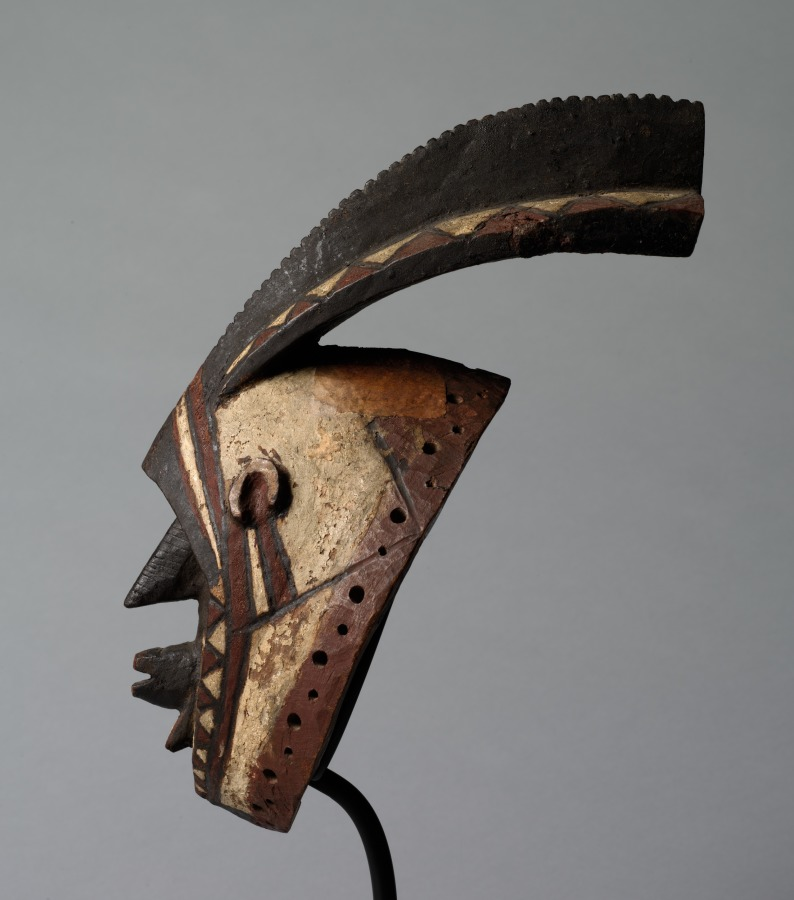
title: Mask (wan-balinga)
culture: Africa, West Africa, Burkina Faso, Mossi-style blacksmith-carver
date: early 1900s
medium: Wood and paint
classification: Mask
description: Only the farmers among the Mossi people employ masks. This mask’s proper name, wan-balinga, evokes a mythical figure who was the mother of the first Mossi ruler. Such masks are most typically worn and danced with on the occasion of the funeral of a male or female elder as escorts of the corpse to the grave. They also appear during annual memorial services that occur months after the actual burial, when all the deceased clan members are commemorated and honored.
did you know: This mask was worn and danced upon the death of an elder, escorting the corpse to the grave.